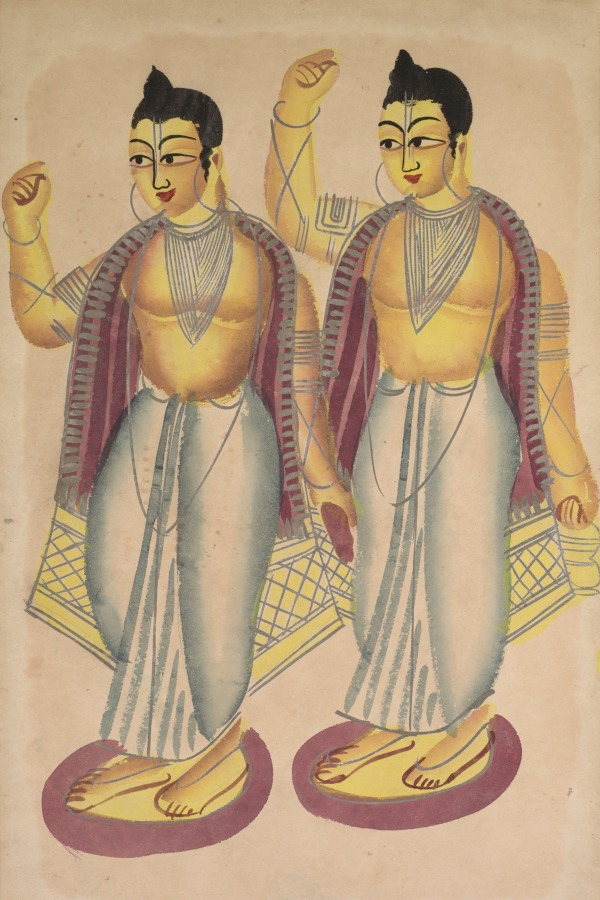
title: Nitai and Gaur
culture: Eastern India, Bengal, Kolkata, Kalighat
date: c. 1890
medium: Gum tempera, graphite, ink, and tin on paper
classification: Painting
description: Pictured are Gaur (the Golden One) and Nitai (he who embodies eternal bliss), Gaur’s disciple par excellence. Gaur, also known as Chaitanya Mahaprabhu, is believed by his followers to be an incarnation of Lord Krishna. Nitai is believed to be an avatar of Balarama and, therefore, the brother and friend of Krishna. They are depicted here with hands raised, chanting a devotional song.